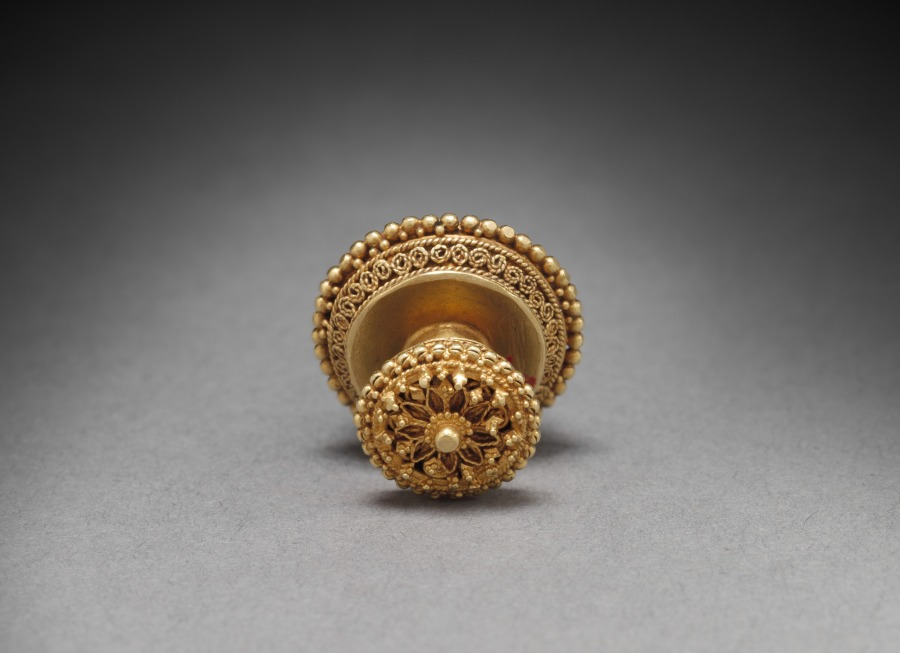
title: Ear Stud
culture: Burma (?)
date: 1800s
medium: gold and rubies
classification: Jewelry